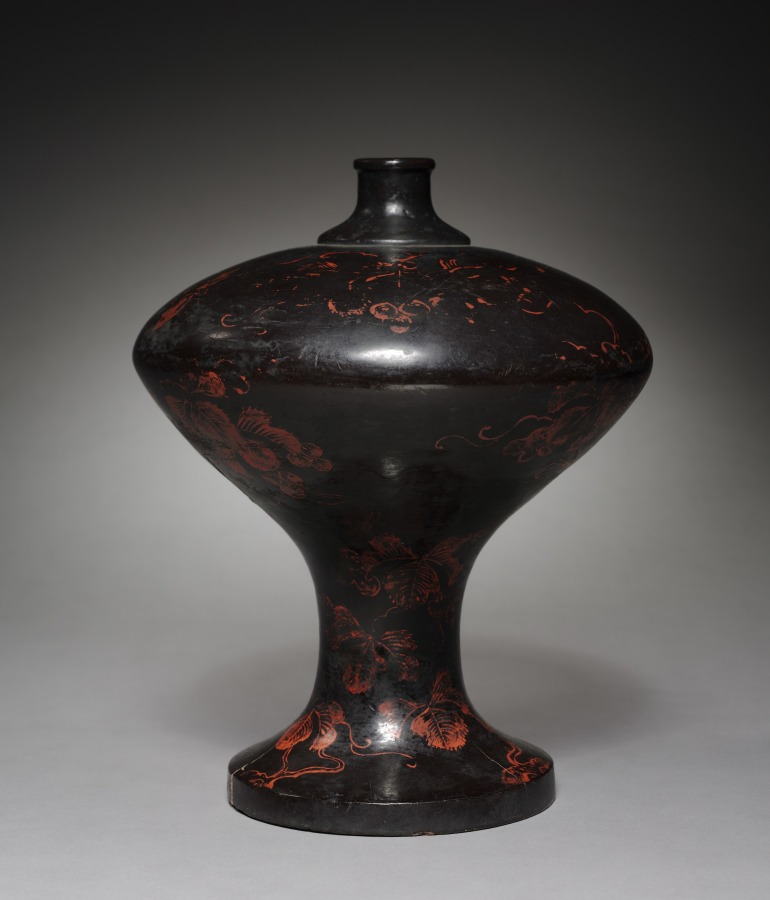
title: Sake Flask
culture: Japan, Muromachi period (1392–1573)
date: 1500s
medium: Black laquered wood with red lacquer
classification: Lacquer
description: This flask contained rice wine, or sake. Its wood body was shaped by a lathe before black lacquer was applied to the surface. A red lacquer design of grapevines, an auspicious motif, covers the surface. With their numerous, long-lasting fruits, grapevines traditionally symbolized fertility and longevity in East Asia.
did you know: The evocative imagery of brushed leaves and bunches of grapes suggest that the artist referred to a particular painting when decorating this vase.